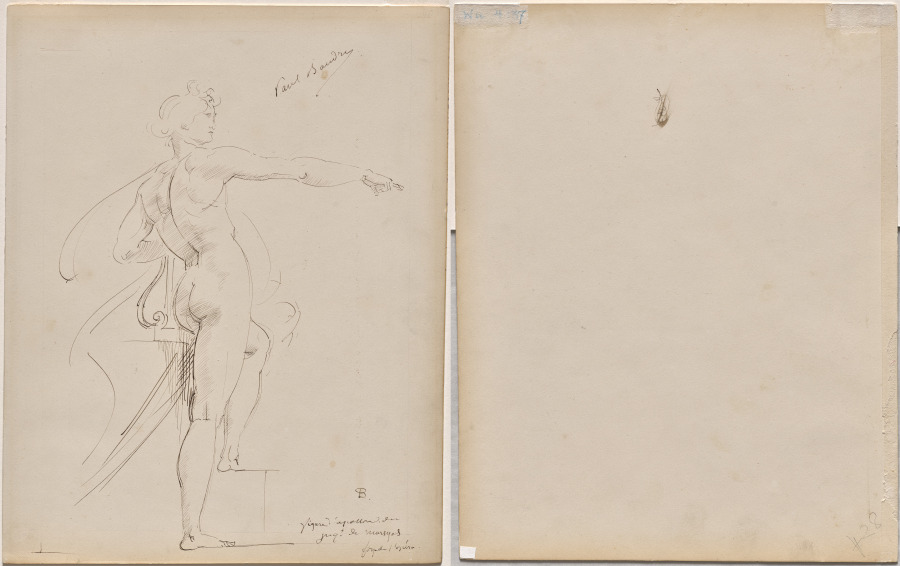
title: Study of Apollo for Marsyas (recto); Face in Profile (verso)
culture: France, 19th century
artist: Paul Baudry (French, 1828–1886)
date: late 1860s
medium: pen and brown ink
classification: Drawing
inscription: recto: Monogrammed and inscribed in brown ink, lower right: B / figure d'Apollon du / jugt de Marsyas / foyer de l'opéra. Signed in brown ink, upper right center: Paul Baudry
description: When Paul-Jacques-Aimé Baudry was commissioned to create the ceiling paintings for the Grand Foyer of the new Paris Opéra in 1864, for inspiration he visited the Sistine Chapel frescoes by Michelangelo—completed more than 300 years earlier. This drawing depicts the god Apollo from behind, intended for a scene in which Apollo points to the satyr Marsyas, with whom he held a musical competition. The pose and figure type recall Michelangelo’s monumental sculpture of David, which Baudry would have also seen on his Italian journey.